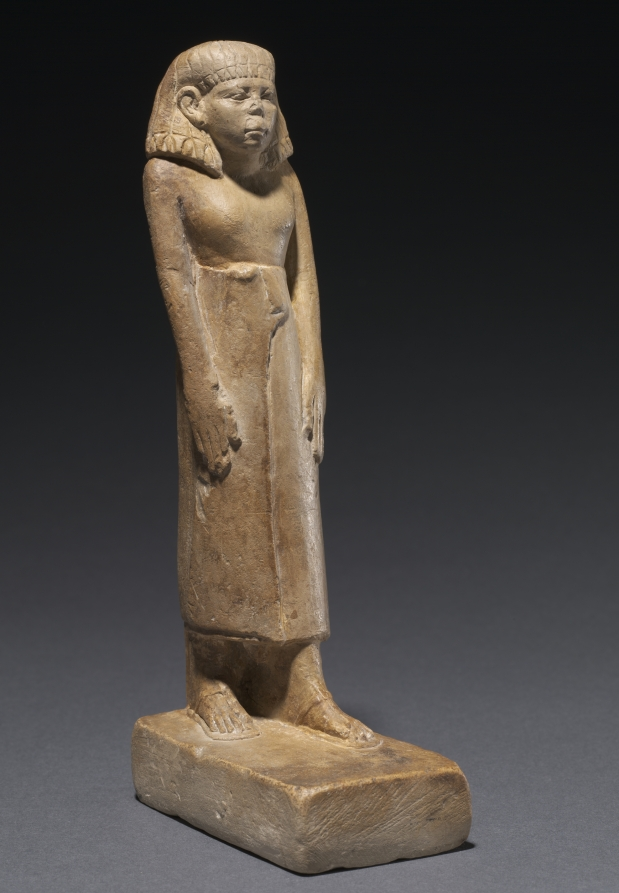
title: Statuette of a Man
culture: Egypt, Middle Kingdom (2040–1648 BCE), Dynasty 12, reign of Amenemhat III (1860–1814 BCE) or later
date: c. 1859–1648 BCE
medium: painted limestone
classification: Sculpture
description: This statuette is an example of the art of the Middle Kingdon in Egypt, which was characterized by tight, compact forms. The man represented here has his arms tucked close to his body and his shoulders raised to his wig. He is tightly wrapped in a long skirt with his feet barely separated. His posture and expression are tense and serious, reflecting the sobriety of this period in Egyptian art.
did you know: This figure has traces of white, red, and black pigment.